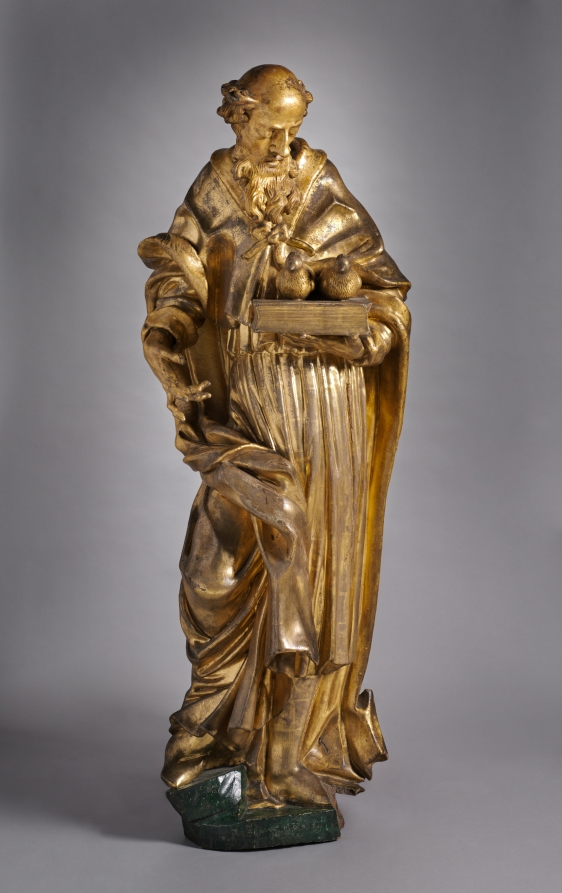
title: Saint Joachim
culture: Germany, 18th century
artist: Joseph Anton Feuchtmayer (German, 1696–1770)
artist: or Circle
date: c. 1760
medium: gilded wood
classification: Sculpture